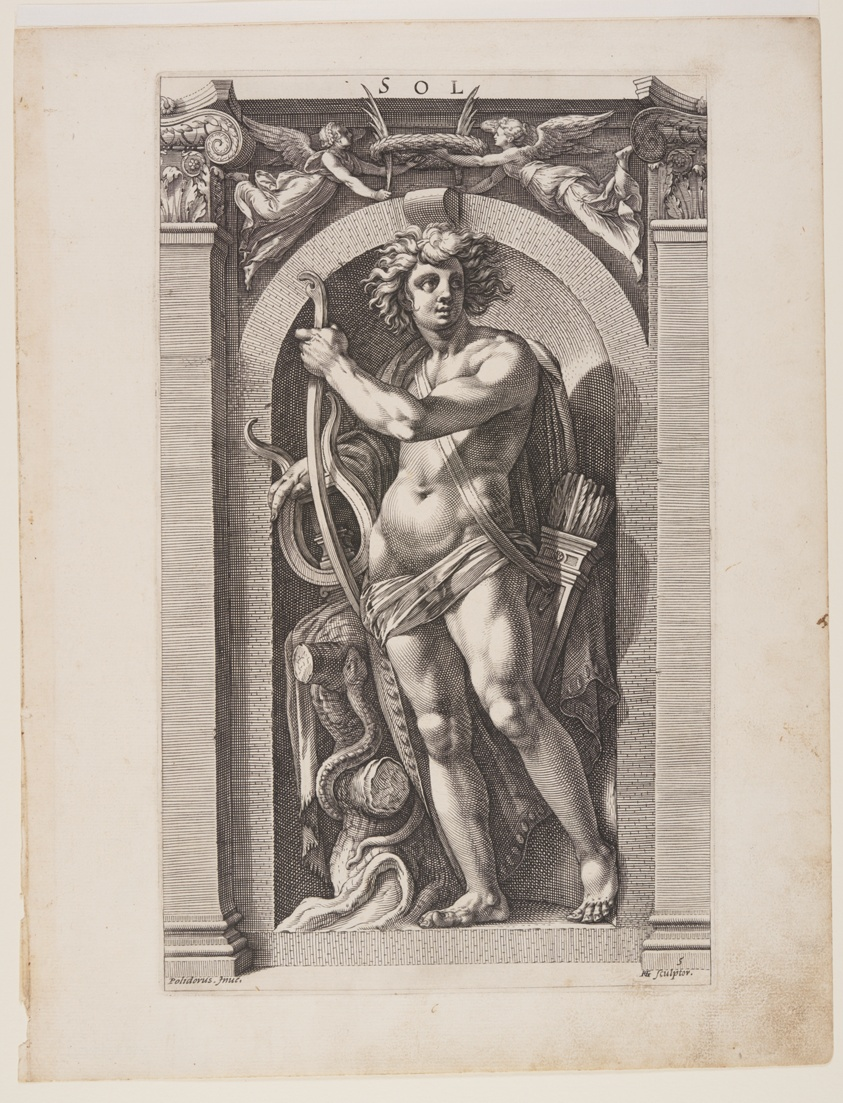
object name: Print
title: Sol, from Eight Pagan Gods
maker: Hendrick Goltzius (Dutch, 1558–1617); after Polidoro da Caravaggio (Italian, c. 1499–c. 1543)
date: 1592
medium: Engraving on ivory laid paper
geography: Netherlands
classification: print; paper; prints and drawing; engraving